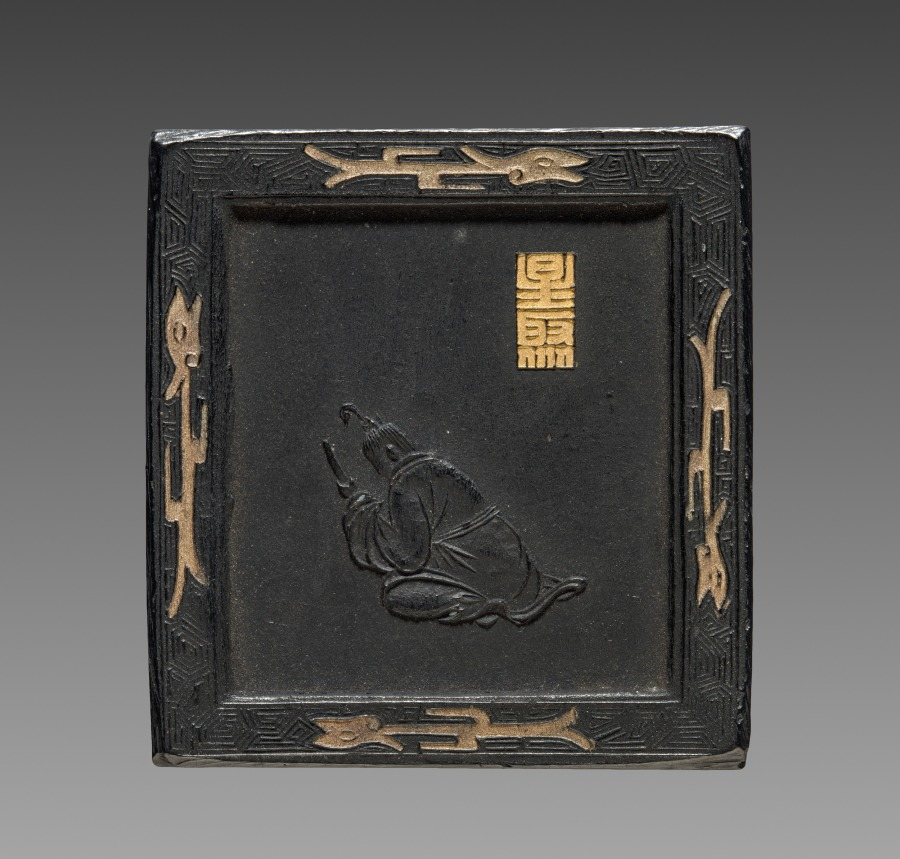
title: Ink Cake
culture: China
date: 1800s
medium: ink cake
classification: Miscellaneous